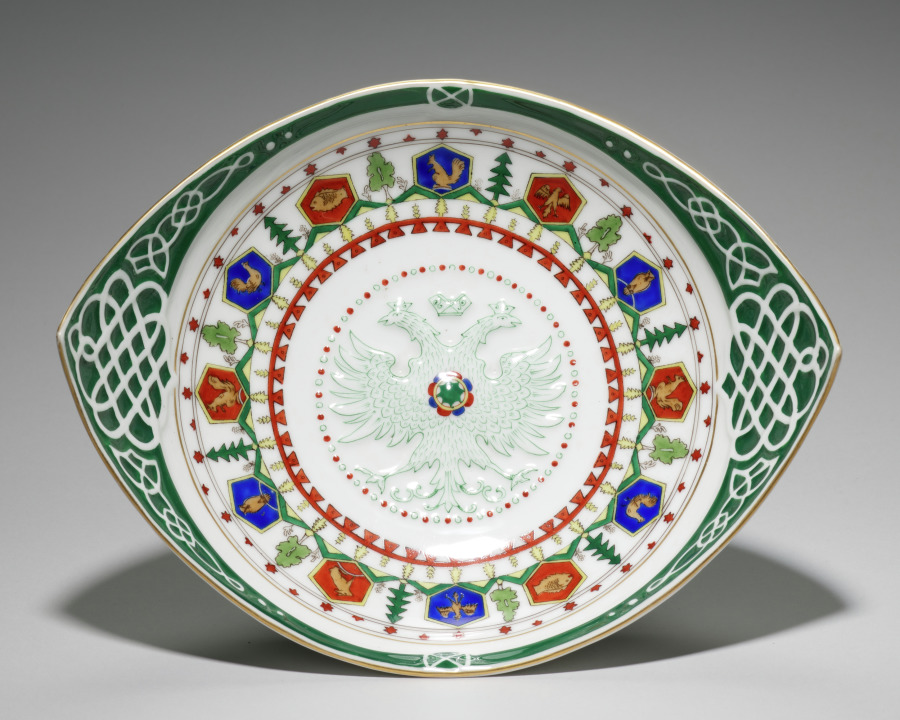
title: Bowl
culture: Russia, St. Petersburg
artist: Kornilov Brothers (Russian, established 1835)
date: between 1891–1917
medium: porcelain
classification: Ceramic